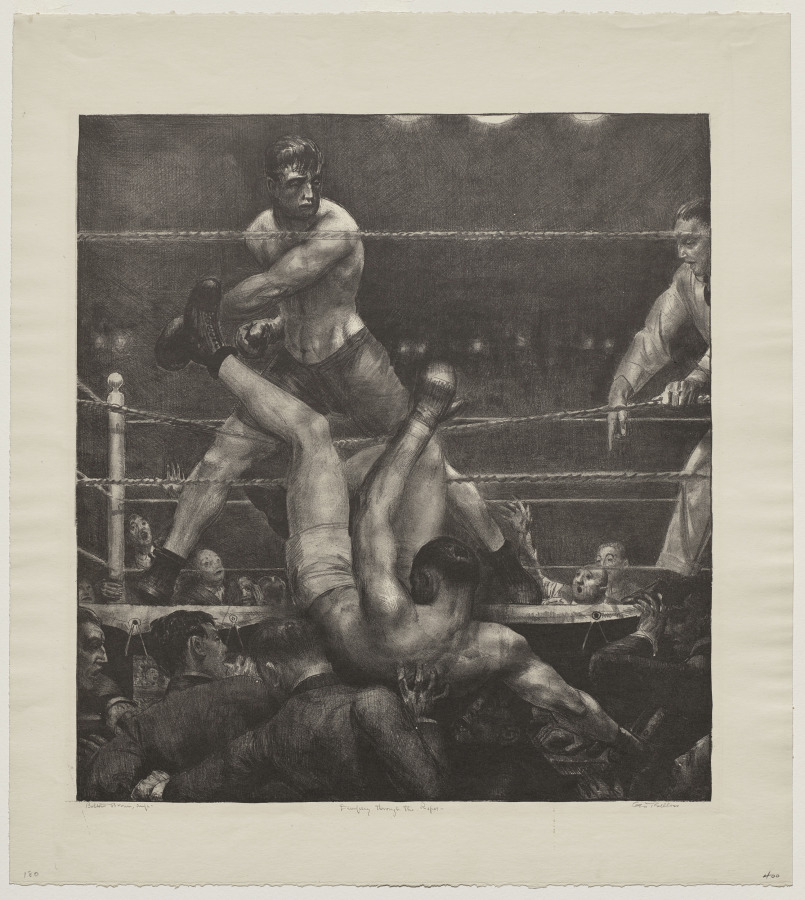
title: Dempsey Through the Ropes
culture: America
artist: George Bellows (American, 1882–1925)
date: 1924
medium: lithograph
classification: Print